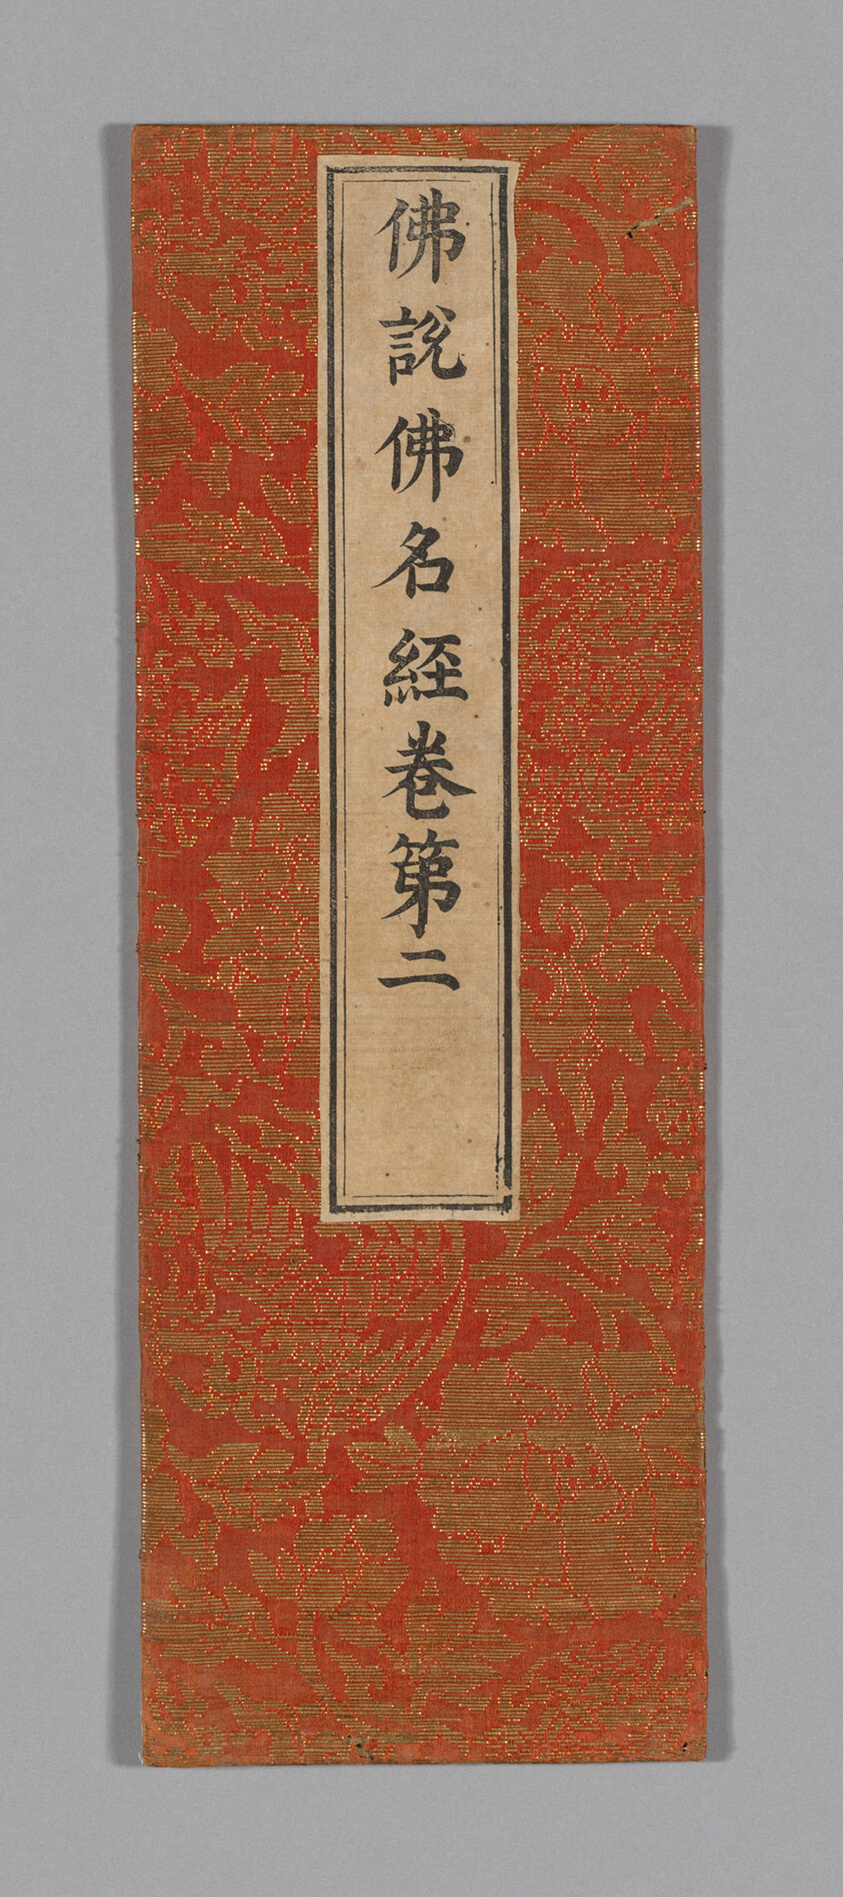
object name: Textile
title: Sutra Cover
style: ming, Chinese (culture or style), East Asian, asian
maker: China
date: Ming dynasty (1368–1644), c. 1590's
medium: Silk and gold-leaf-over-lacquered-paper strips, warp-float faced 4:1 satin weave with supplementary patterning wefts bound in weft-float faced 1:4 satin interlacings; label: paper printed with ink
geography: China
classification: textile; weaving